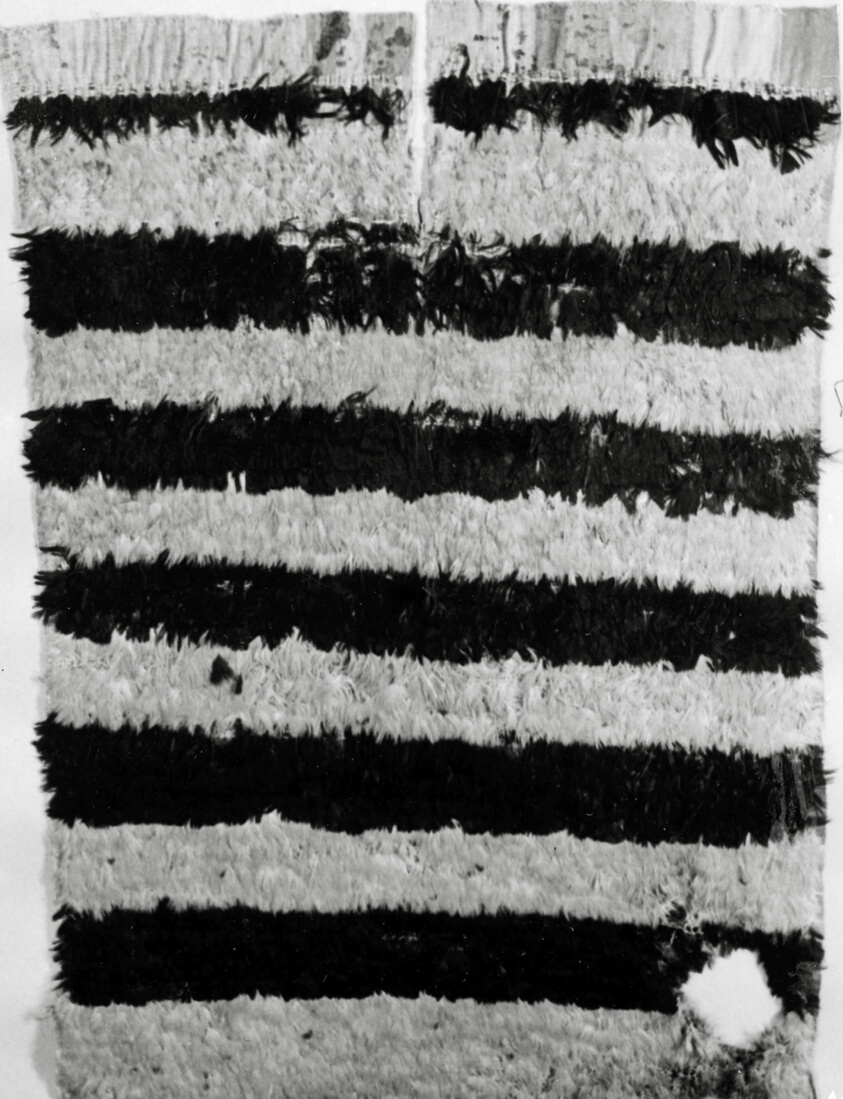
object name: Textile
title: Fragment (Possibly From a Tunic)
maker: Peru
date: 600/1532 A.D.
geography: Peru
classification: textile; weaving